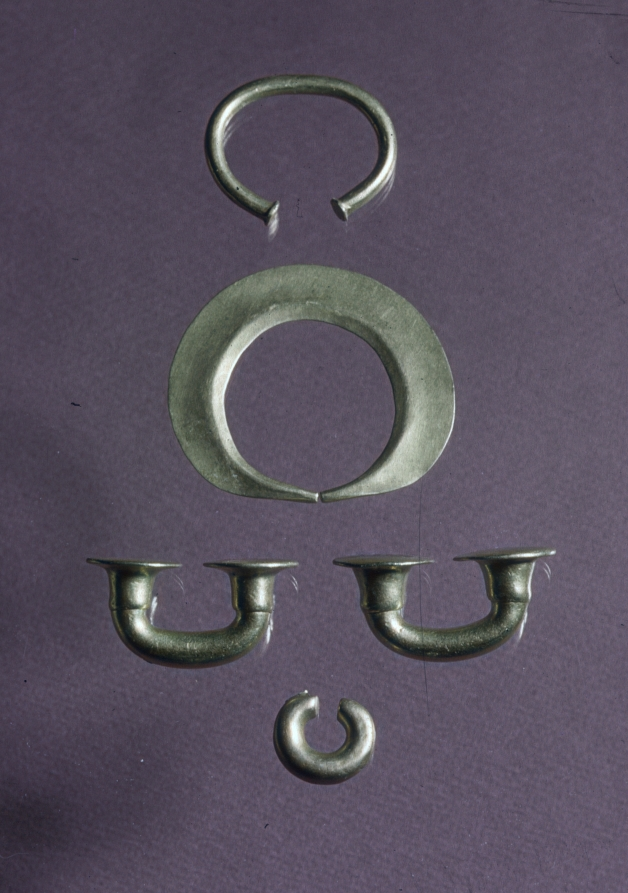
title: Nose Ornament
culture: West-central Colombia, Quimbaya style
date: c. 400–1000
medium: hammered gold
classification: Jewelry